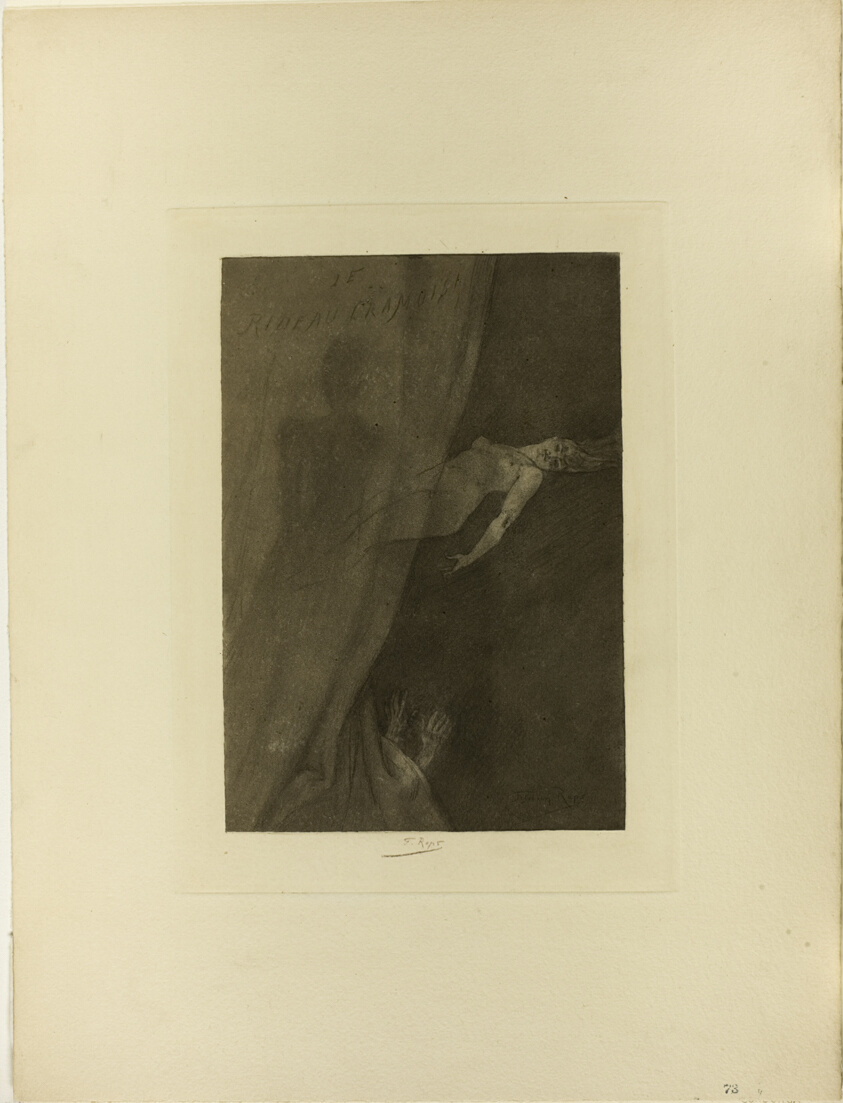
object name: Print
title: The Crimson Curtain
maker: Félicien Rops (Belgian, 1833-1898)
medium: Heliogravure, with aquatint and soft varnish ("vernis mou") on cream wove paper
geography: Belgium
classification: photogravure; print; prints and drawing